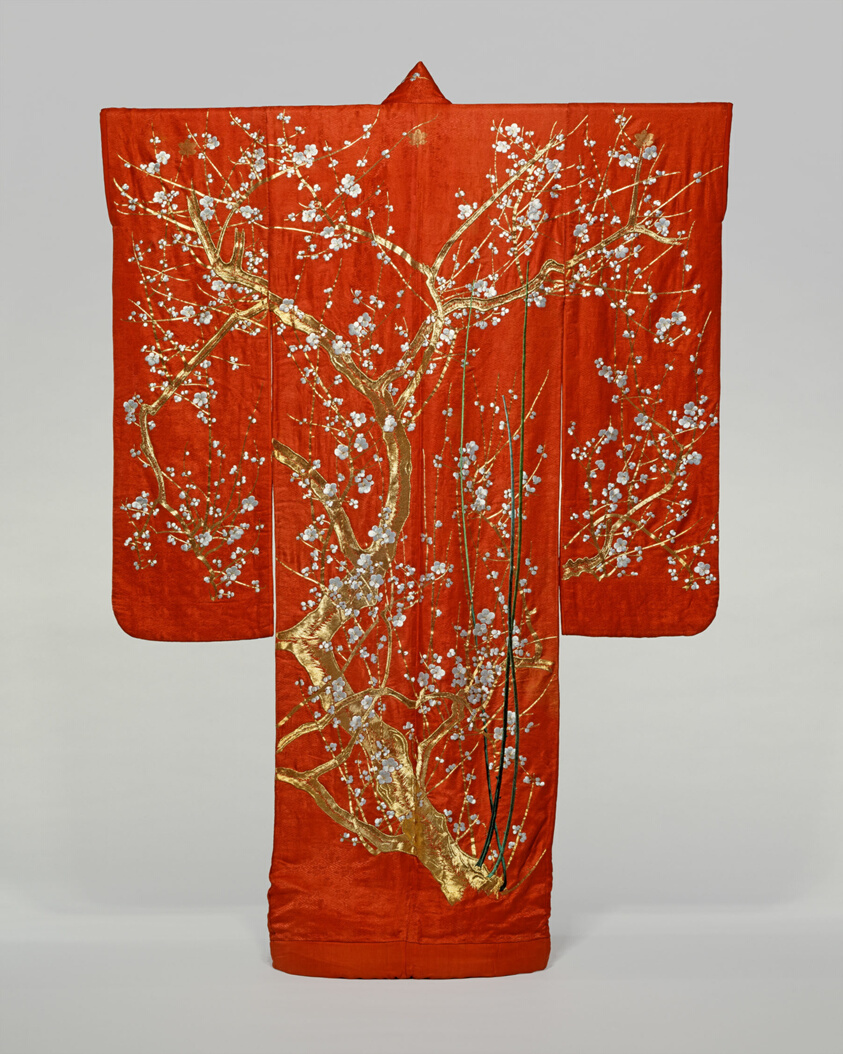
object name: Textile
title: Furisode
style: late edo, Japanism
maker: Japan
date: late Edo period (1789–1868), 1801/1868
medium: Silk, 4:1 satin damask weave (rinzu); embroidered with silk and gold-leaf-over-lacquered-paper-strip-wrapped silk in satin stitches; laid work and couching, and padded couching; lined with silk, plain weave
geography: Japan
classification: kimonos; needlework (visual works); textile; asian art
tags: plants, trees, plum trees, flowers